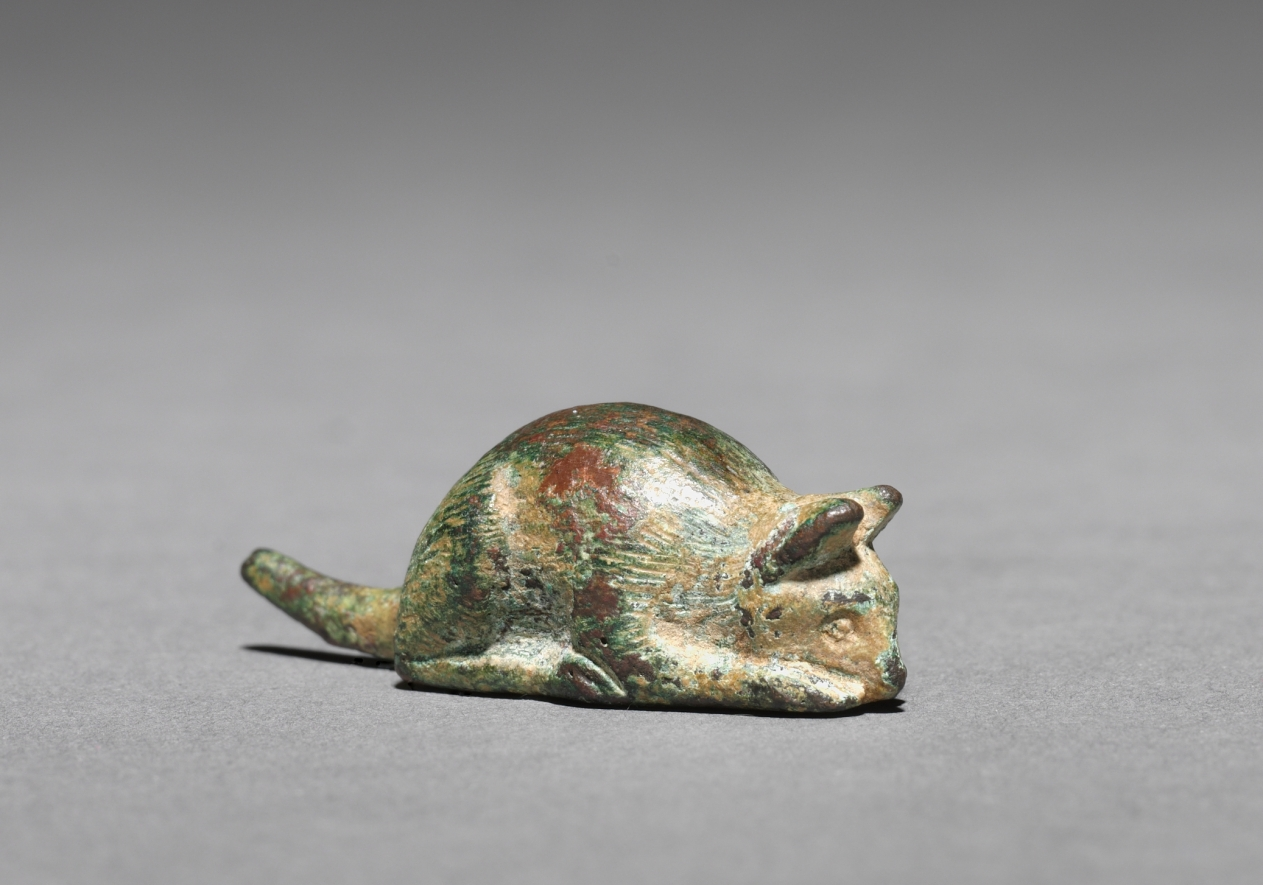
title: Mouse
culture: Italy, Rome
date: 1–200 CE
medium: bronze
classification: Sculpture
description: The Romans were the first people in antiquity to make large numbers of genre sculptures for no purpose other than household decoration. This mouse may have been just such a knick-knack or it may have ornamented a metal food container laying claim to its contents so that other mice would stay away.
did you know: Small mouse figurines were often affixed to oil lamps to ward off living mice that might eat the wicks or lamp oil